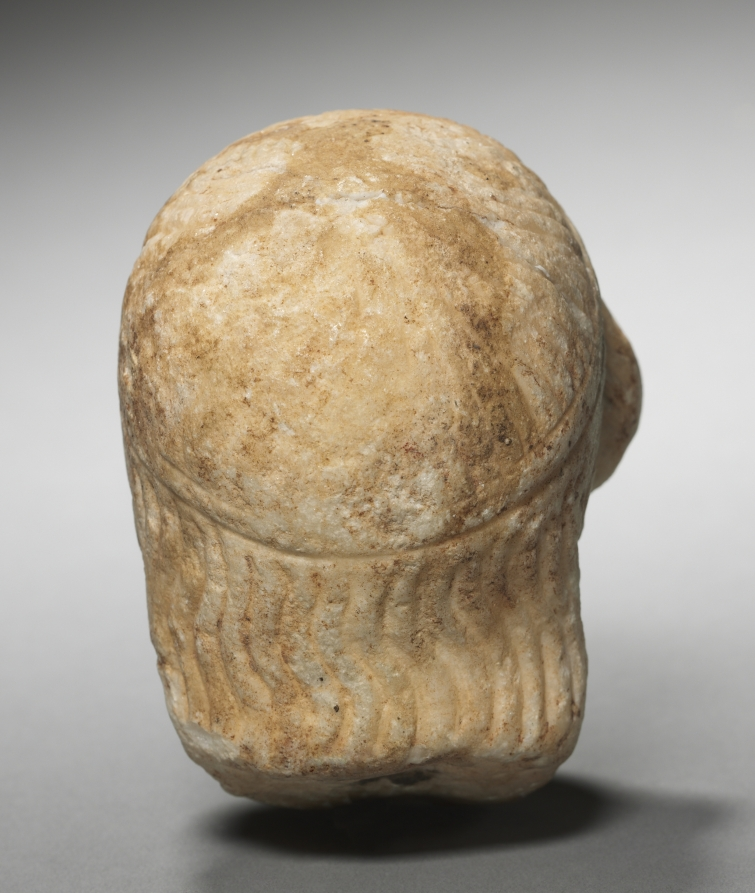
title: Head of a Kore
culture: Greece, Amorgos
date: c. 480–460 BCE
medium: marble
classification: Sculpture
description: This small head probably once belonged to a full-body statuette of a young woman, a miniature of the Archaic Greek kore statue type. She has heavily lidded eyes and wears a double-banded fillet around her hair. The face and front of the hair are damaged and weathered. A statuette such as this one was likely made as a votive gift to a goddess.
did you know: Kore,which means maiden, is also another name for the Greek goddess Persephone.